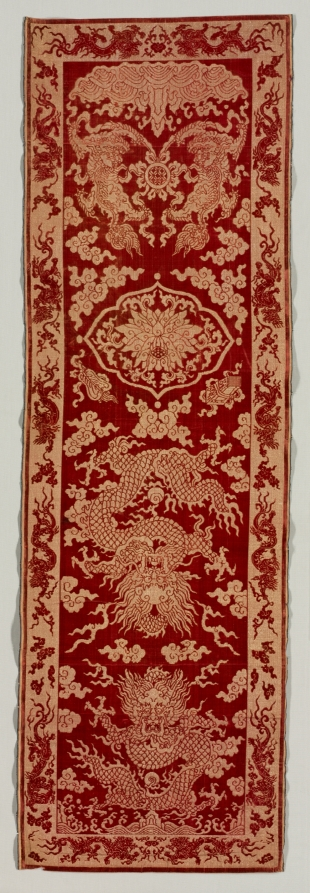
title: Velvet Strip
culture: China, Qing dynasty (1644-1911)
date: mid-1800s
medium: Velvet and gold thread; brocade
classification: Velvet